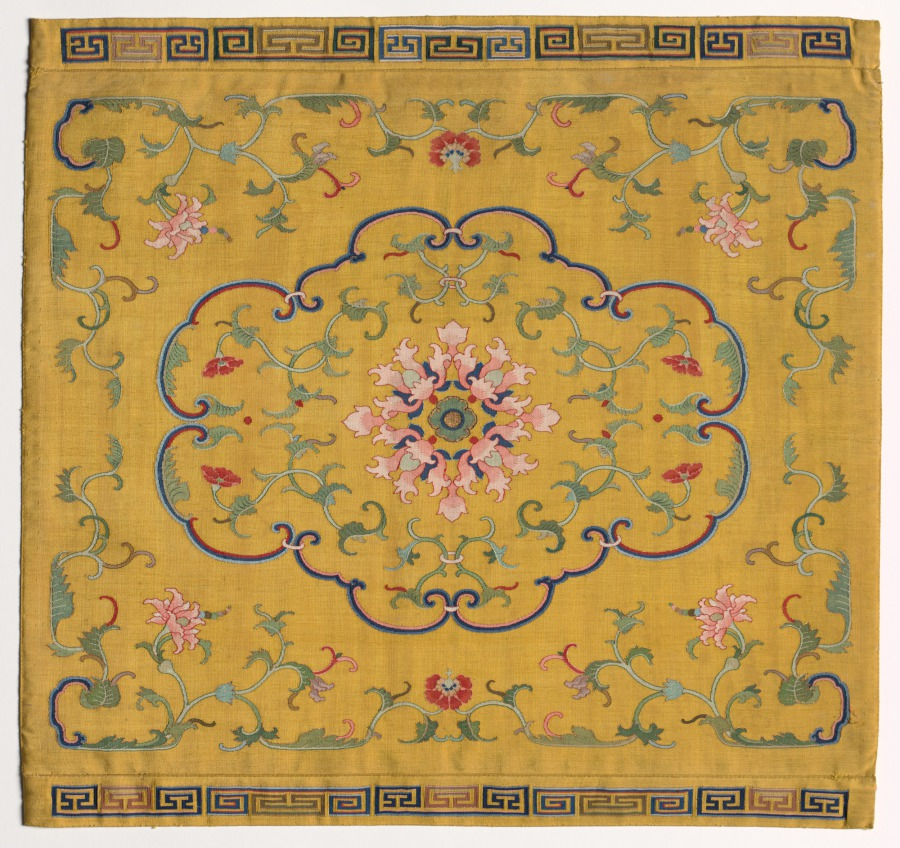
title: Cushion Cover (one of a set of four)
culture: China, Qing dynasty (1644-1911)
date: 1700s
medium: silk, metallic thread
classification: Textile